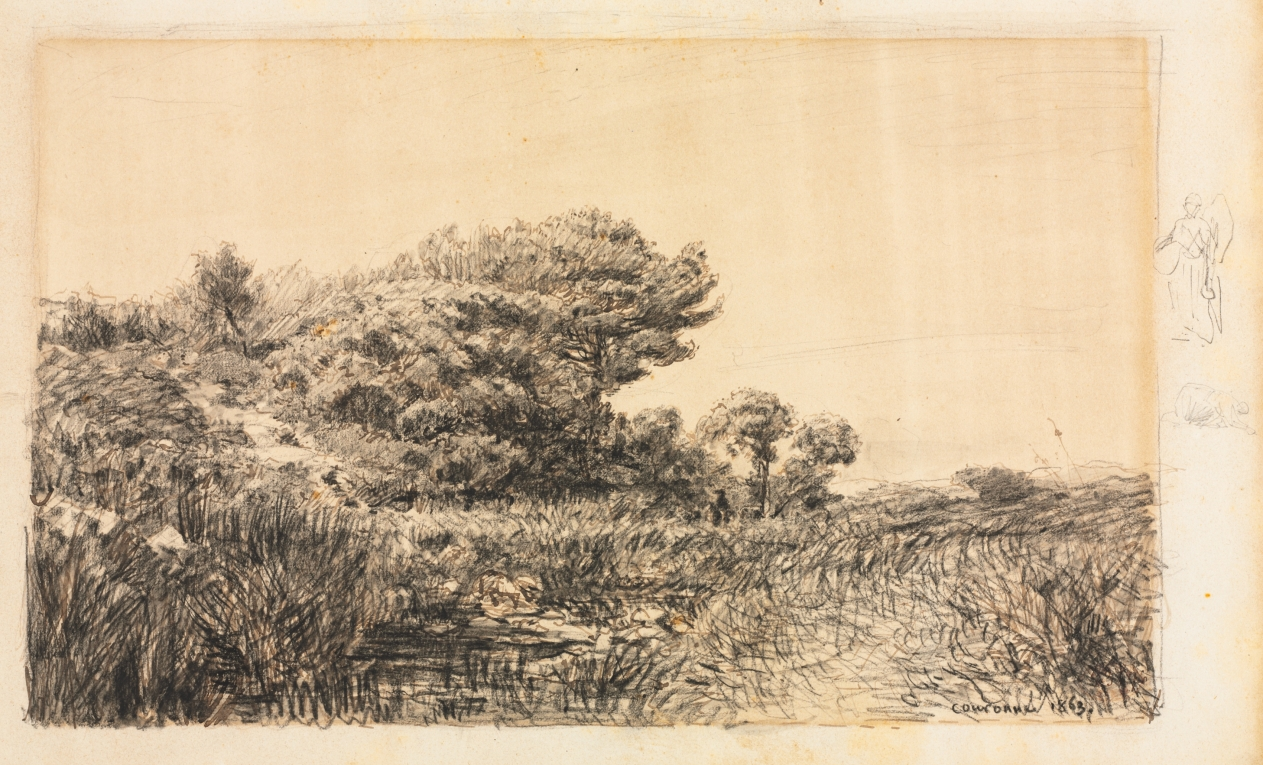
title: Edge of Marsh at Couronne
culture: France, 19th century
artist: Félix Ziem (French, 1821–1911)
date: 1863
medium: pen and brown ink, black crayon and brush and gray wash; framing lines in black crayon; two figures in right margin in black crayon (top figure) and graphite (bottom figure)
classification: Drawing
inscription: by artist, lower right, in black crayon: Couronne 1863. ; VERSO, upper right, in graphite: No 29 [sideways]